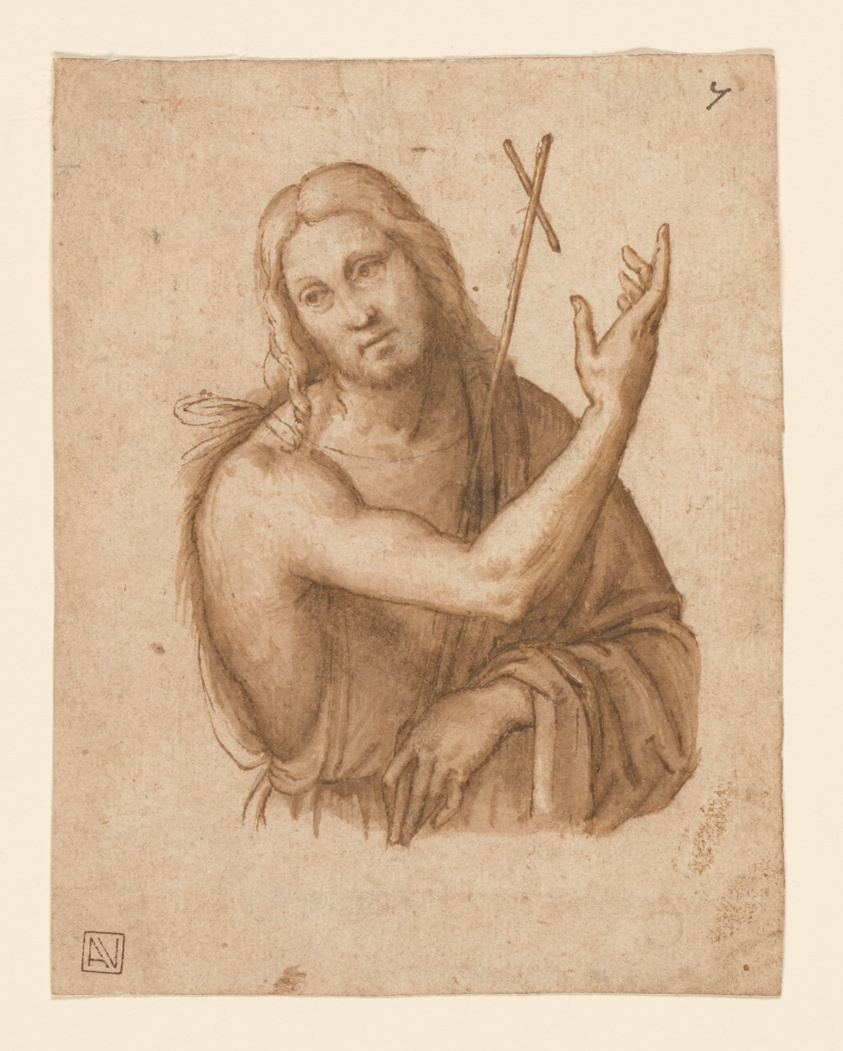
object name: Drawing and Watercolor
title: Saint John the Baptist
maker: After Francesco Francia; Italian, c. 1450–1517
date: second half of the 16th century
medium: Pen and brown iron gall ink, with brush and brown wash, heightened with touches of white gouache, on cream laid paper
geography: Italy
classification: drawings (visual works); paper; prints and drawing